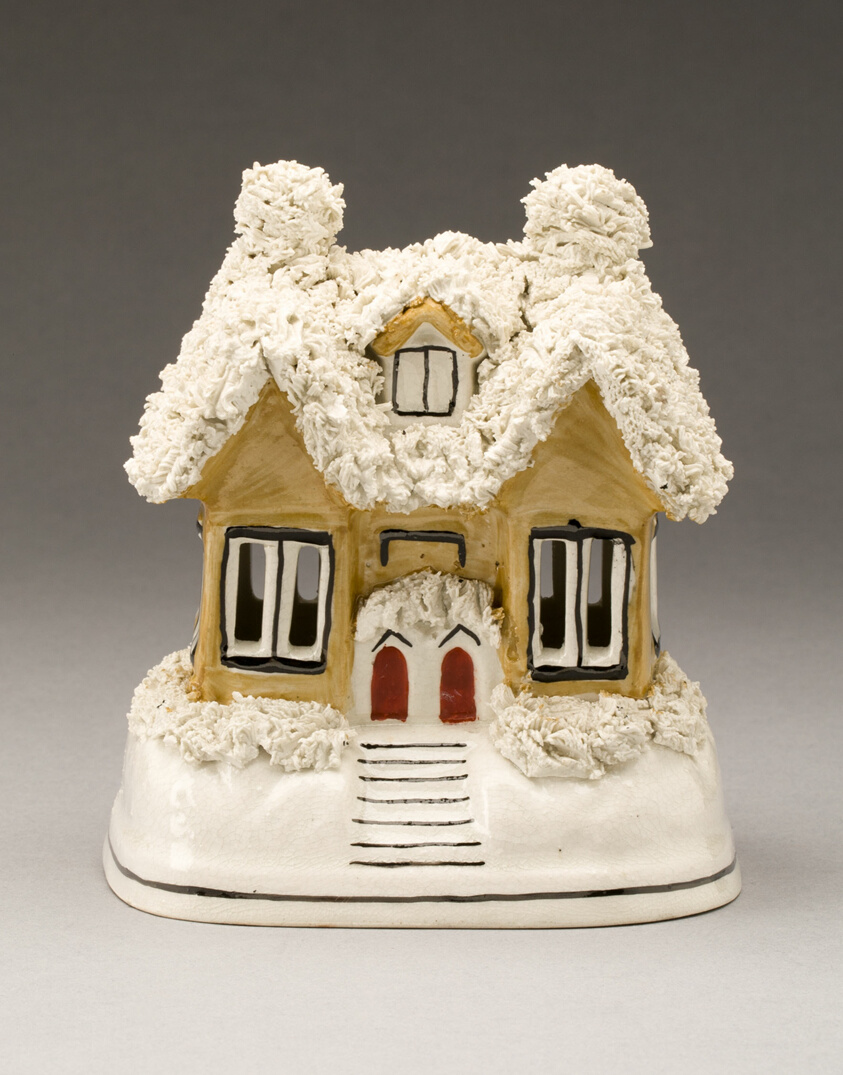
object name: Ceramics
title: Incense Burner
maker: England, Staffordshire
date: c. 1830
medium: Glazed earthenware with polychrome enamel decoration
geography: Staffordshire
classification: ceramics